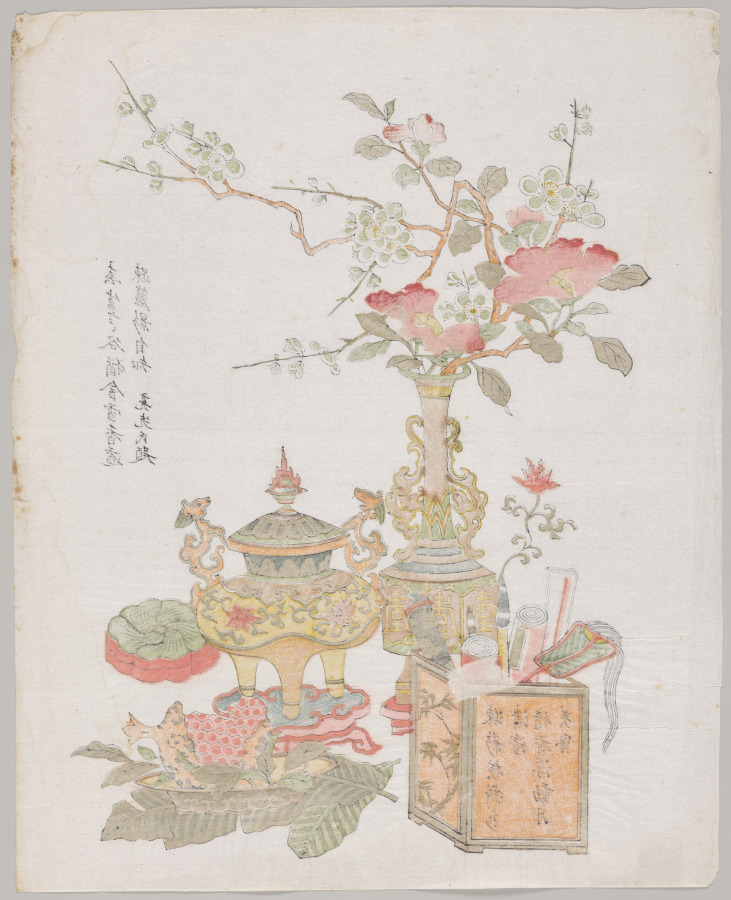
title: Plum and Camellia in a Bronze Vase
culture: China, Suzhou, Qing dynasty (1644–1911)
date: 1700–1750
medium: Polychrome woodblock print; ink and color on paper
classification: Print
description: In the 1600s, printing flourished in such Jiangnan cities as Nanjing, Suzhou, Hangzhou, and Huizhou, evolving from privately enjoyed illustrated books printed in color to more commercialized single-sheet color prints that were hung on walls and became part of the rich urban visual culture.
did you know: Woodblock printing in color reached a height in China in the 1600s to 1700s. The prints were executed by means of sets of separate blocks, each carved to print a different color.